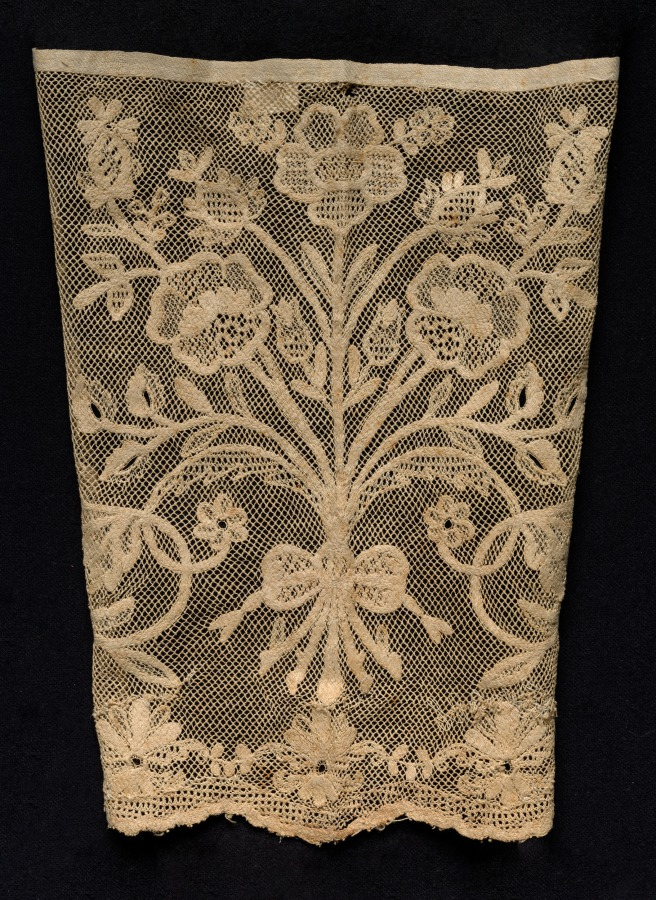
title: Cuff with Floral Vines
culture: Unassigned, 1800s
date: 1800s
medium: Bleached linen (est.): needle lace, filet/lacis (knotted ground and darned in one direction)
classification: Lace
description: In this lace cuff (one of a set, see 1936.225), scrolling vines with budding flowers emerge from a tied bow, creating a stylized bouquet. A scrolling vine with budding vegetation or a tendril motif is a recurring pattern in needle lace. The frequent use of the motif, adapted in lace from different centuries and regions, suggests that it was found in a pattern book.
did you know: From the 15th century, lace cuffs were among the most popular ways to wear and display this costly textile.